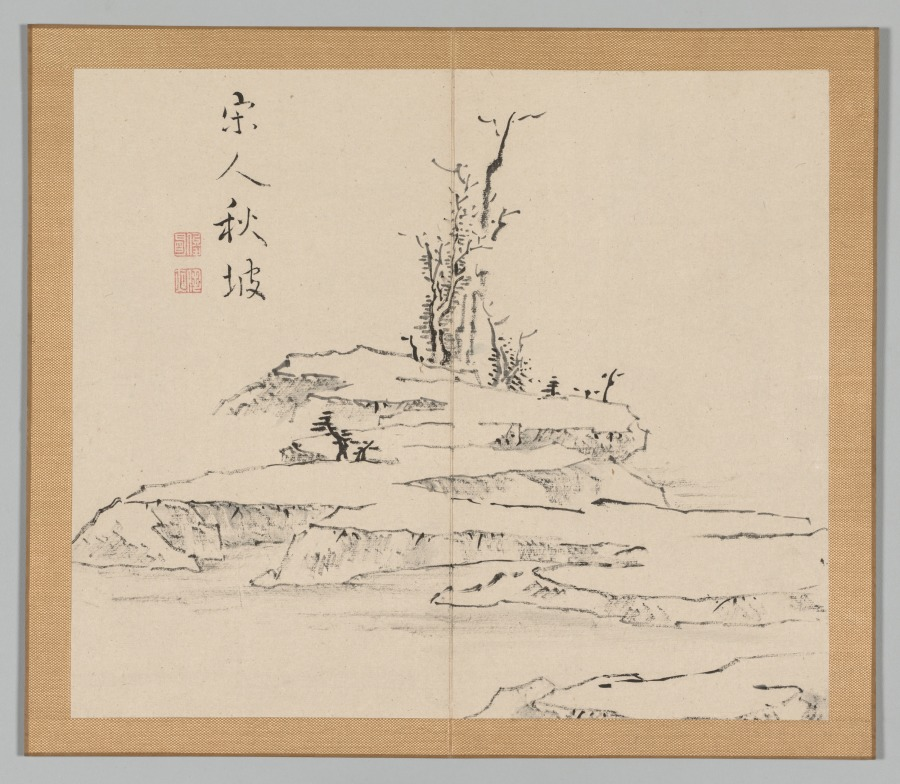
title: Reverberations of Taiga, Volume 2 (leaf 12)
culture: Japan, Edo period (1615–1868)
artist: Aoki Shukuya (Japanese, d. 1802)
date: mid- to late 1700s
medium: double-leaf from a pair of albums; ink and light color on paper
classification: Portfolio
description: Traditionally, young painters in Japan began their studies with an established master-painter. The master's compositions invariably became models that the apprentice copied to learn various ink and brush techniques. Shukuya was a pupil of the famous Kyoto artist Ikeno Taiga, whose style is reflected in these sketches of rocks, trees, and mountains.